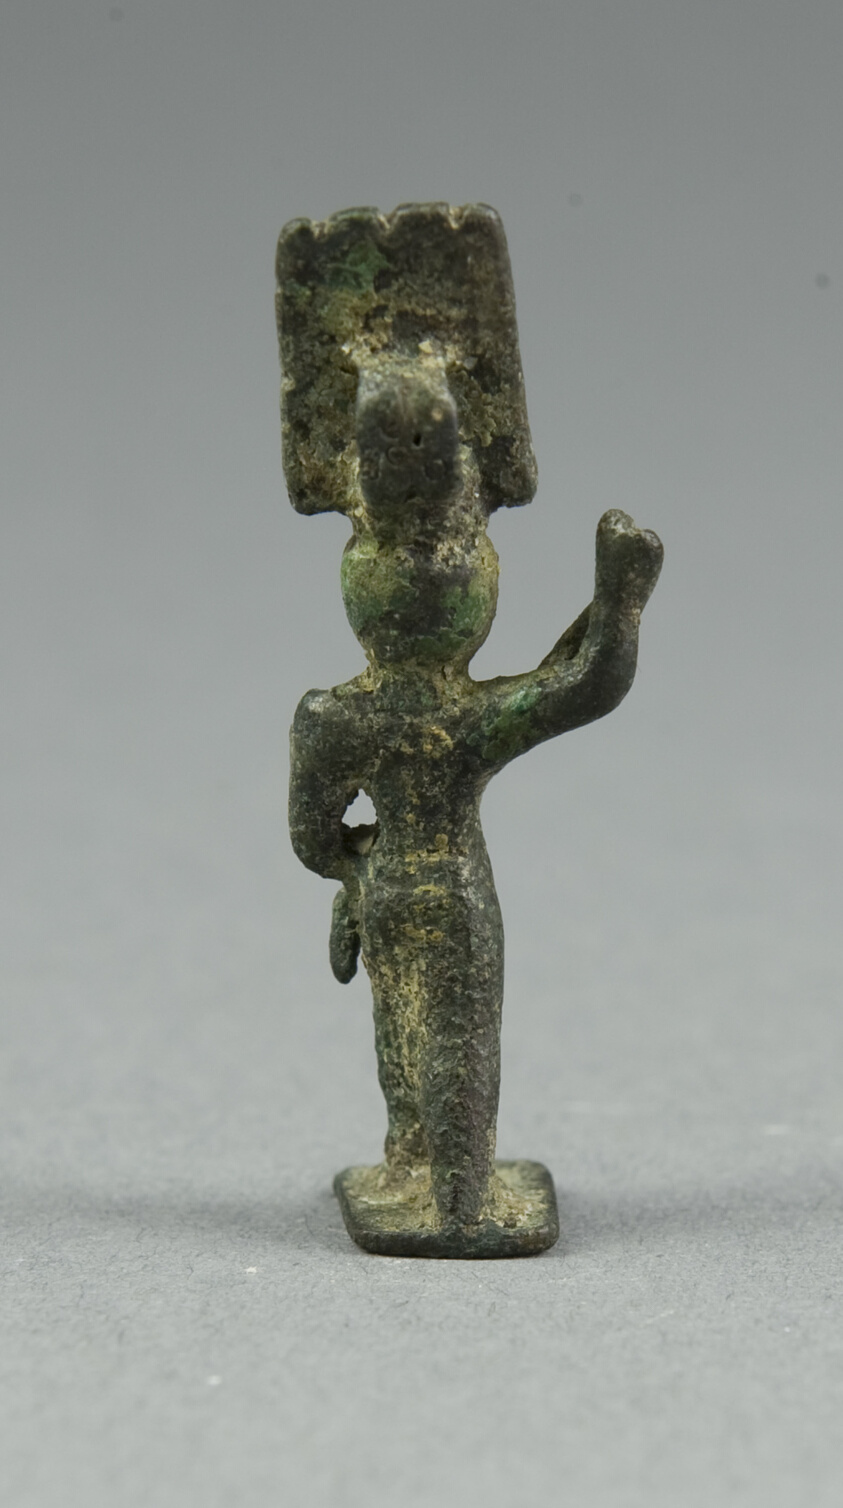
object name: Costume and Accessories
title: Amulet of the God Onuris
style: third intermediate period, egyptian, ancient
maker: Egyptian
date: Third Intermediate Period, Dynasty 21–25 (1070–656 BCE)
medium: Copper alloy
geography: Egypt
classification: amulet; jewelry; bronze; metal; ancient art; costume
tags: gods (deities)